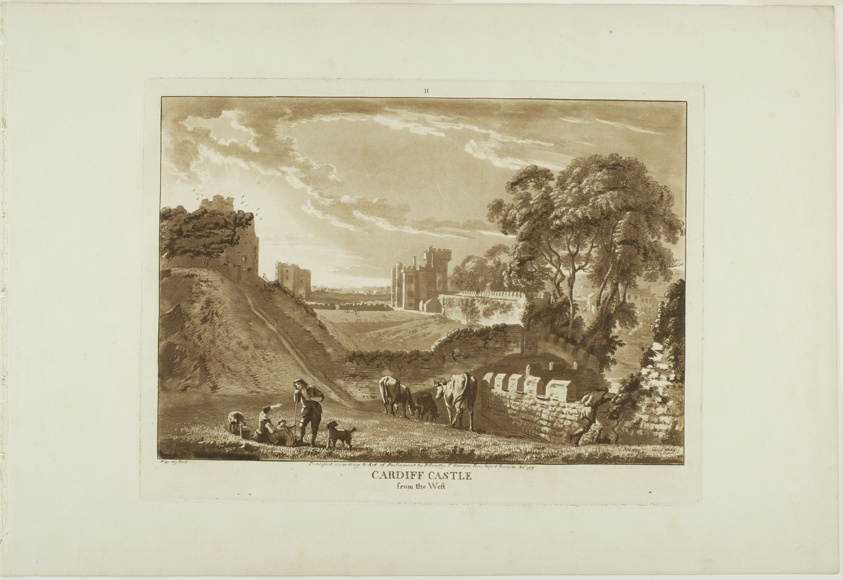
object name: Print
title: Cardiff Castle from the West, plate two from Twelve Views in Wales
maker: Paul Sandby (English, 1731-1809)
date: 1777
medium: Aquatint with etching in brown on cream laid paper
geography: England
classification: aquatint; print; prints and drawing